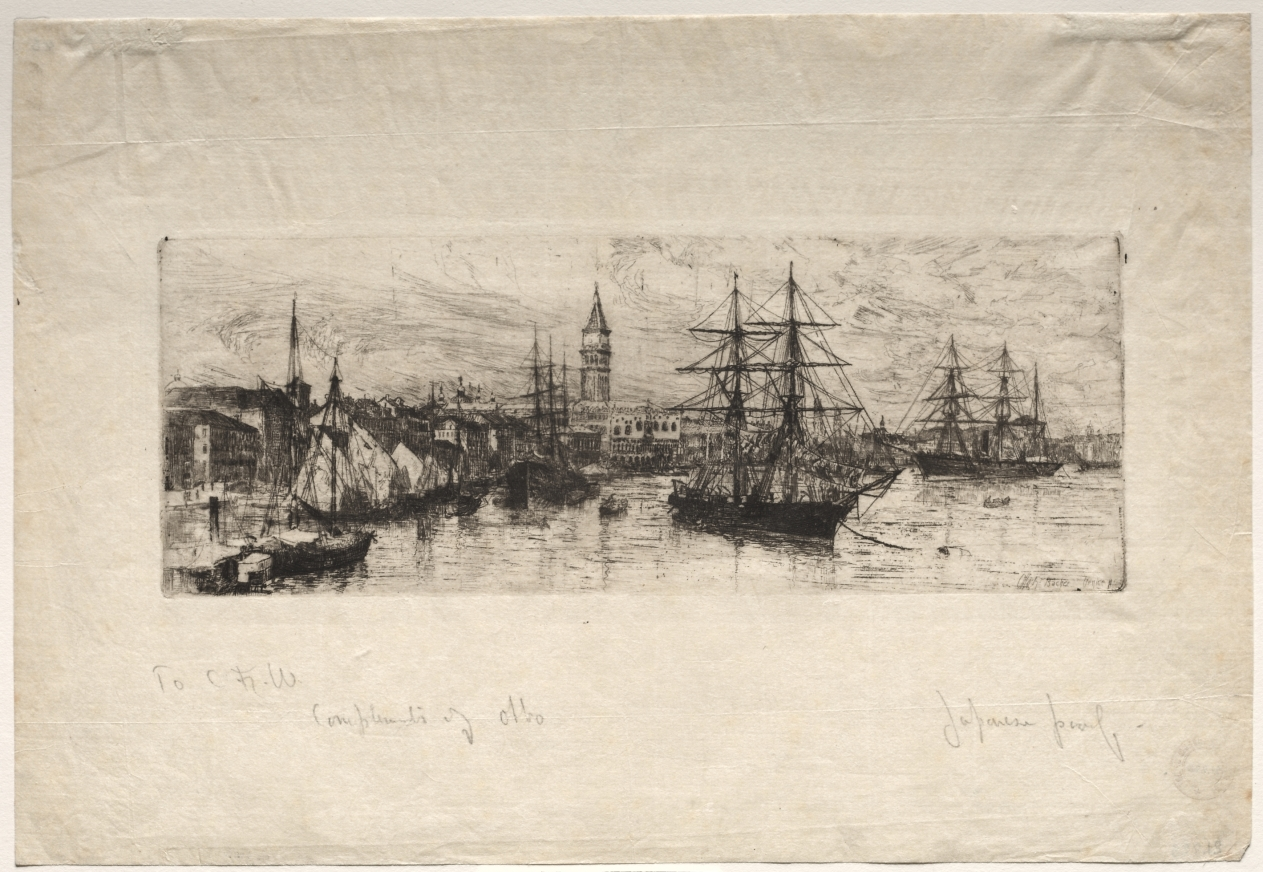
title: Shipping and the Ducal Palace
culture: America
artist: Otto H. Bacher (American, 1856–1909)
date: 1880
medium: etching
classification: Print